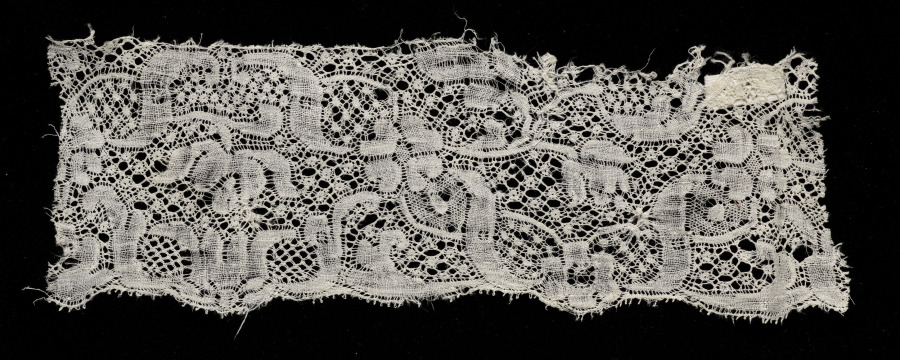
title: Lace Edging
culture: Spain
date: 1700s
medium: Bobbin lace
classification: Lace